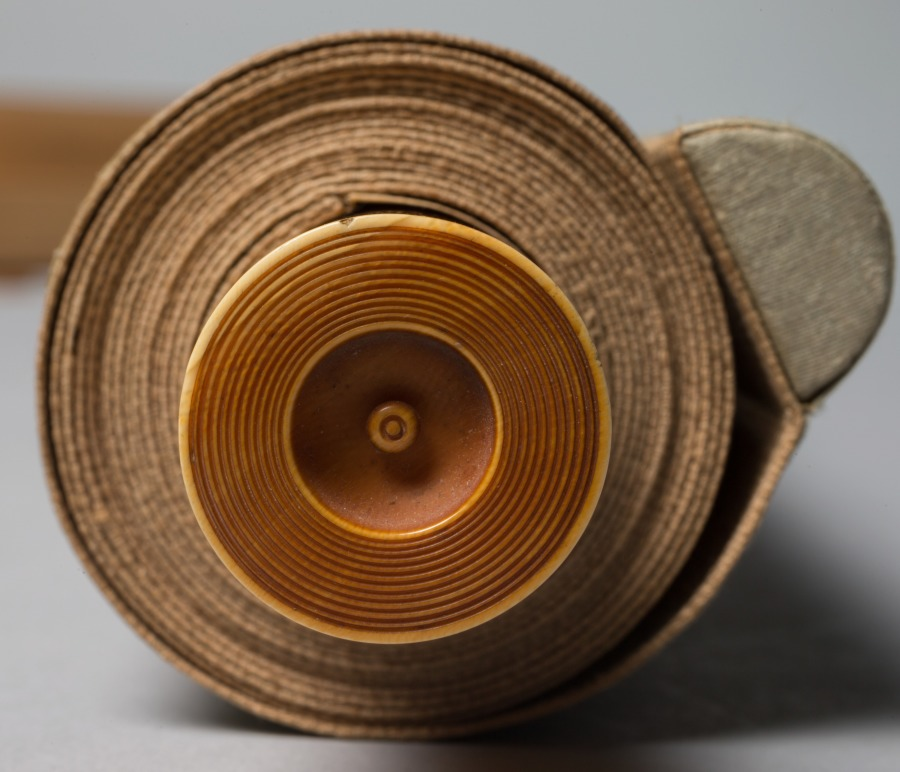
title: Summer Flowers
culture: Japan, Edo period (1615–1868)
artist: Kitagawa Sōsetsu (Japanese, active 1639–50)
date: mid-1600s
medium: hanging scroll; ink, color, and gold on paper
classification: Painting